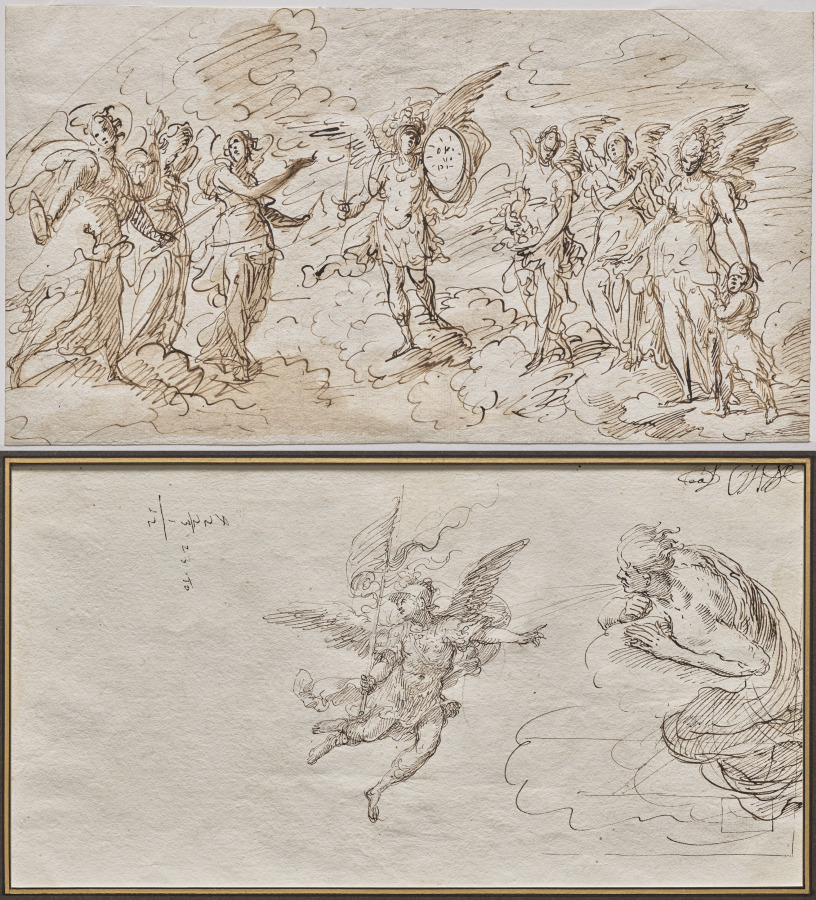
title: The Seven Archangels (recto); Studies of an Archangel and a Wind God (verso)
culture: Italy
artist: Massimo Stanzione (Italian, 1585–1656)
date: c. 1620s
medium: Pen and brown ink, brown wash, traces of black chalk (recto); pen and brown ink (verso),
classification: Drawing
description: Massimo Stanzione worked in the Spanish-held Kingdom of Naples, where, during the 1600s, painting was characterized by dramatic expression, emphatic naturalism, and intense chiaroscuro derived from the profound influence of Caravaggio (1571–1610). Stanzione, however, was known in the city as one of the main purveyors of a more classical style, a kind of antithesis to the passion and drama of such Neapolitan painters as Jusepe de Ribera. This drawing relates directly to a painting Stanzione made depicting the seven archangels at the Monasterio de la Descalzas Reales in Madrid. The iconography of the seven archangels was a regional focus of devotion in the Neapolitan kingdom, and in Spain, where the cult of the “Seven Angelic Princes” had been promoted by the 16th-century Sicilian friar Antonio Del Duca (1491–1564).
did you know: The Archangel Michael is shown at the center of the composition, surrounded by six more archangels, from left to right, Gabriel, Uriel, Jehudiel, Barachiel, Selathiel, and Raphael.